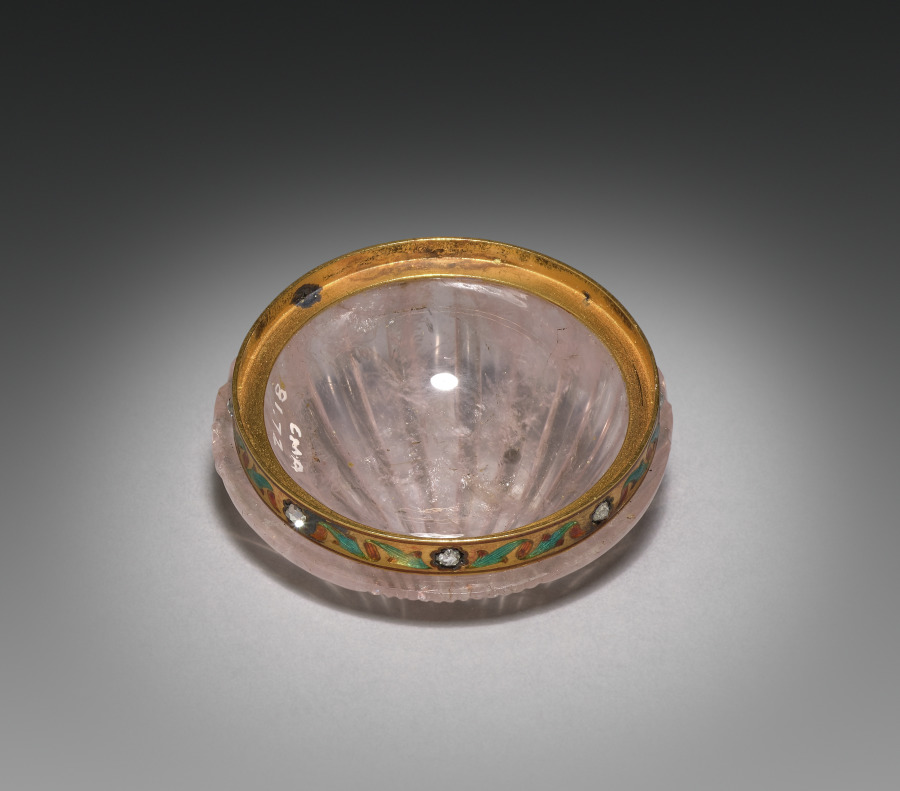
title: Shell-Shaped Box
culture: Italy (?), 19th century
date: late 1800s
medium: pink quartz, gold, enamel, diamonds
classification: Stone